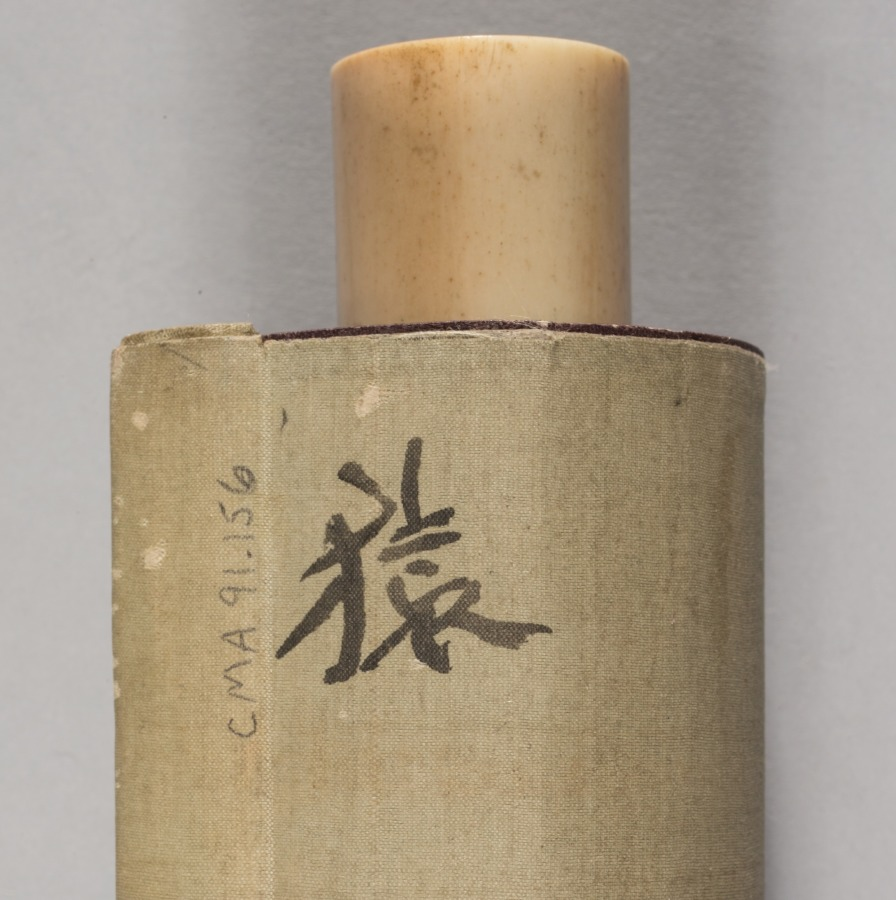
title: Monkeys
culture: Japan, Edo period (1615–1868)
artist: Gyokutei Katsu (Japanese)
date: c. 1800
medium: hanging scroll; ink on paper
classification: Painting